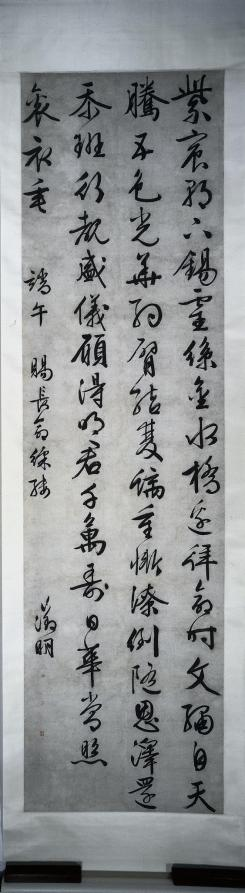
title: Poem on Imperial Gift of an Embroidered Silk: Calligraphy in Running-Standard Script (xingkaishu)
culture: China, Suzhou, Ming dynasty (1368-1644)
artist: Wen Zhengming (Chinese, 1470–1559)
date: c. 1525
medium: Hanging scroll; ink on paper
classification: Calligraphy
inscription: The text of the calligraphy, which is also included in Wen Zhengming's literary compilation, can be translated as follows: From the throne, this exquisite silk was bestowed on me,/ As I expressed my gratitude to His Majesty by the Goldwater Bridge./ This heavenly silk is embroidered with five colors./ Resplendent it is, draping over my arm with [designs of] twin dragons./ Having received such a gift, I [bowed] in shame over my lack of achievements./ Humbly I returned to my rank to observe the grand ceremony./ I wish His Majesty shall live on for myriad years,/ And the sun will always shine upon His trailing robe.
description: A poem by the influential Wen Zhengming from Suzhou in southeastern China expresses Wen’s gratitude to the Jiajing emperor (reigned 1522–67) for a gift of embroidered silk bestowed in appreciation of his commendable service. The elegant, well-composed, and energetically written large characters in deep black ink reflect the handwriting of a distinguished scholar-artist. Works of calligraphy by Wen of this large scale are rare. The poem reads: As I expressed my gratitude to His Majesty by the Goldwater Bridge. This heavenly silk is embroidered with five colors. Resplendent it is, draping over my arm with [designs of] twin dragons. Having received such a gift, I [bowed] in shame over my lack of achievements. Humbly I returned to my rank to observe the grand ceremony. I wish His Majesty shall live on for myriad years, And the sun will always shine upon His trailing robe.